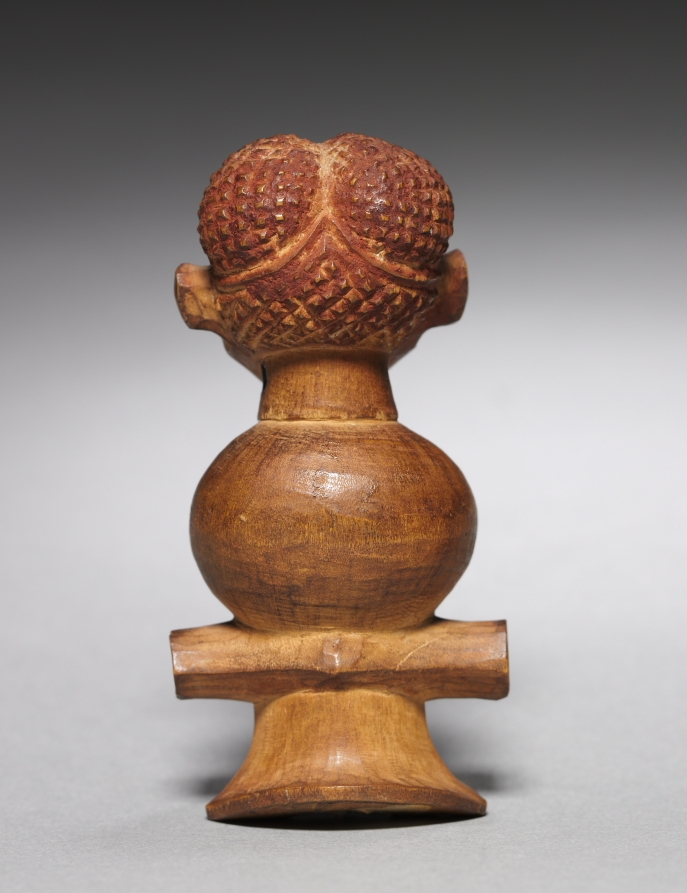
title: Whistle (kasengosengo)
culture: Africa, Central Africa, Democratic Republic of Congo, Pende-style maker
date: before 1915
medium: wood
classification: Musical Instrument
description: This small whistle displays a finely detailed head with bi-lobed coiffure similar to Pende masks.